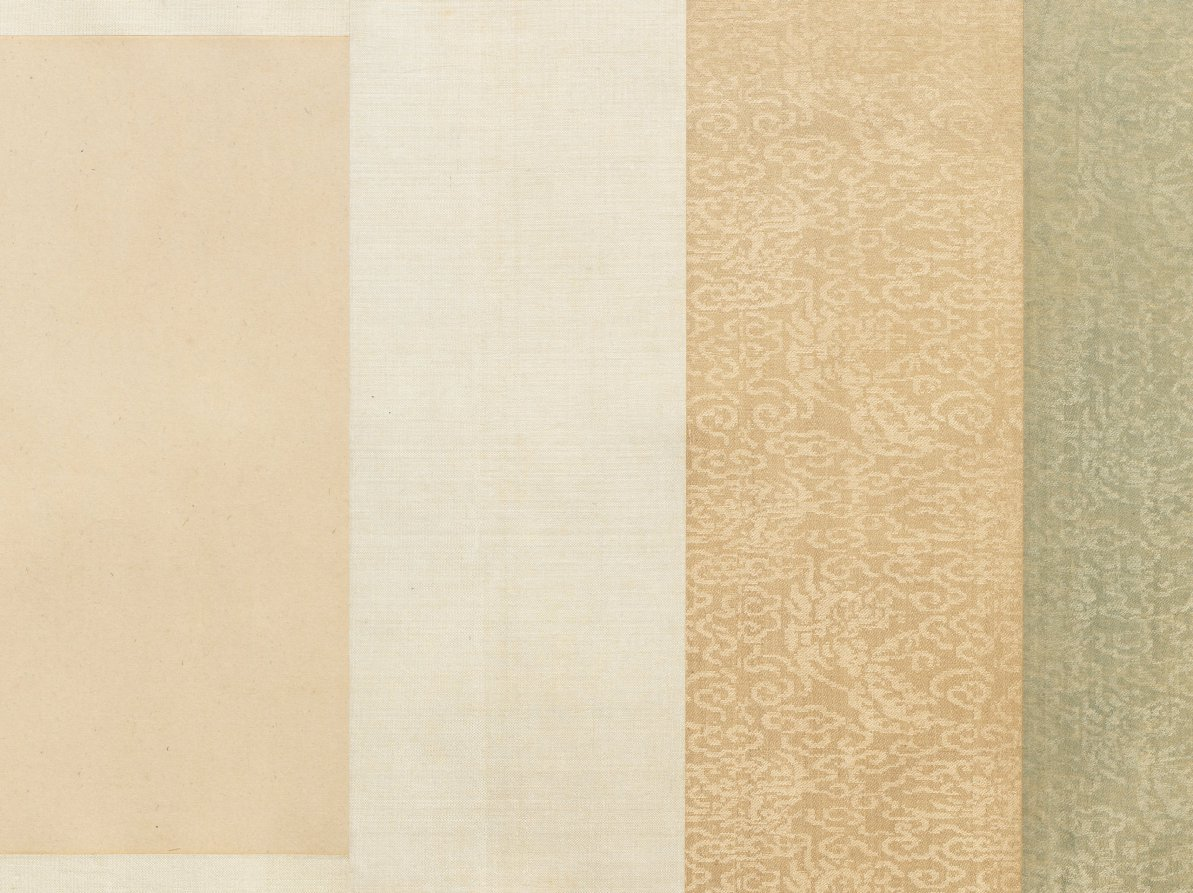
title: Sericulture (The Process of Making Silk)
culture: China, Southern Song dynasty (1127-1279)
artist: attributed to Liang Kai (Chinese, mid-1100s–early 1200s)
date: early 1200s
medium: Handscroll; ink and color on silk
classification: Painting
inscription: 3 colophons and 7 seals of Ch'eng Ch'i (20th c.).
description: By the Southern Song period, the economic center of the silk industry had shifted to the lower Yangzi delta, while the north continued to be troubled by wars. Divided into three sections, the handscroll illustrates 14 steps in the process of making silk, from the raising of silkworms to the weaving of silk cloth. The scroll’s scenes follow the illustrations of Lou Shou’s (1090–1162) Pictures of Tilling and Weaving (gengzhi tu), the first recorded painting of this genre, which was conceived in Hangzhou around 1145. However, in the Cleveland painting the artist groups several scenes of sericulture together under the roof of an open structure.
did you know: The painting is attributed to Liang Kai, a court artist active from about 1201 to 1204 at the Imperial Painting Academy in the city of Hangzhou, a major silk weaving center from that time to the present day.